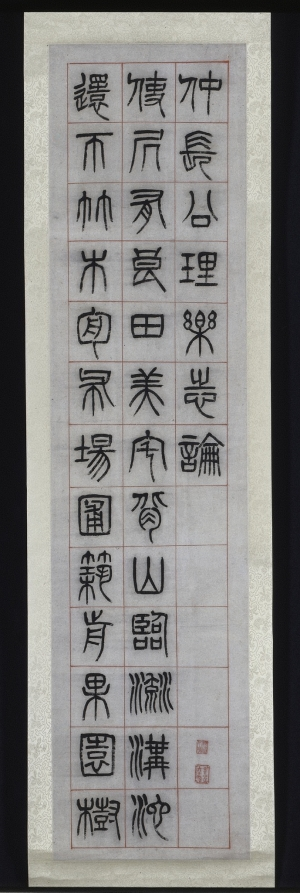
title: On Happiness, Calligraphy in Seal Script Style (zhuanshu)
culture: China, Changsu, Qing dynasty (1644-1911)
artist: Yang Yisun (Chinese, 1813–1881)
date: 1871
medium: hanging scroll, ink on paper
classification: Painting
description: Yang Yisun transcribed this ancient text on six narrow scrolls, starting at the top right and ending at the bottom left. Yang emphasizes the text’s historic nature by using the seal script style found on stone steles and bronze vessels. On Happiness features reflections of a scholar on a leisurely life in the countryside, composed by Han dynasty official Zhongchang Tong, who died the year the Han dynasty collapsed (AD 220). The idyllic life described in the text may bean evocation of the past in a time of national crisis. A decade before Yang wrote these scrolls, Anglo- French forces had looted and burned the Summer Palace in Beijing. At the same time, the domestic Taiping rebellion (1850–64), led by a religious fanatic to overthrow the Qing government, had devastated Yang’s homeland, the Jiangnan region, with an estimated 20 million lives lost.